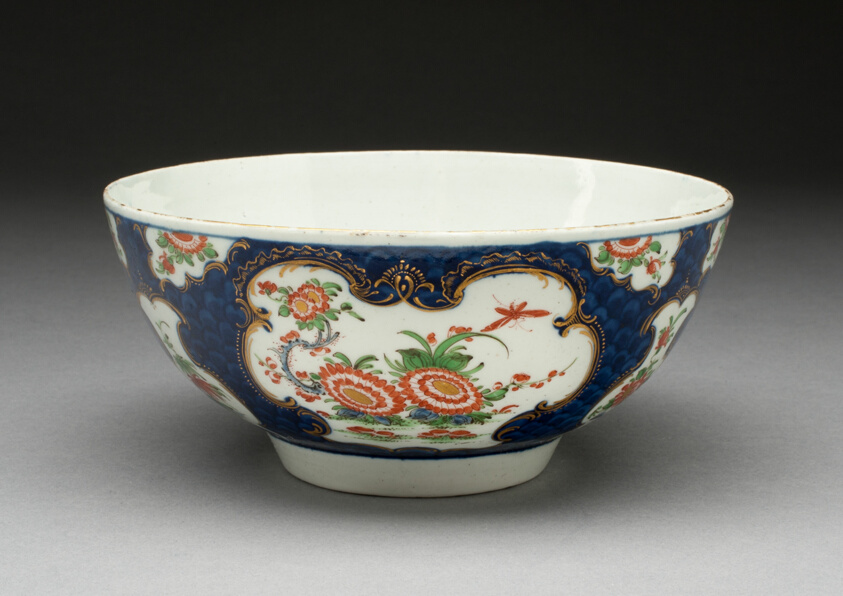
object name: Ceramics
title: Slop Bowl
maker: Worcester Porcelain Factory (Warmstry House Period, 1751–1783); Worcester, England, founded 1751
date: c. 1770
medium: Soft-paste porcelain, underglaze blue, polychrome enamels and gilding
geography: Worcester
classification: slop bowl; teaware; tableware; ceramics; porcelain; european decorative arts